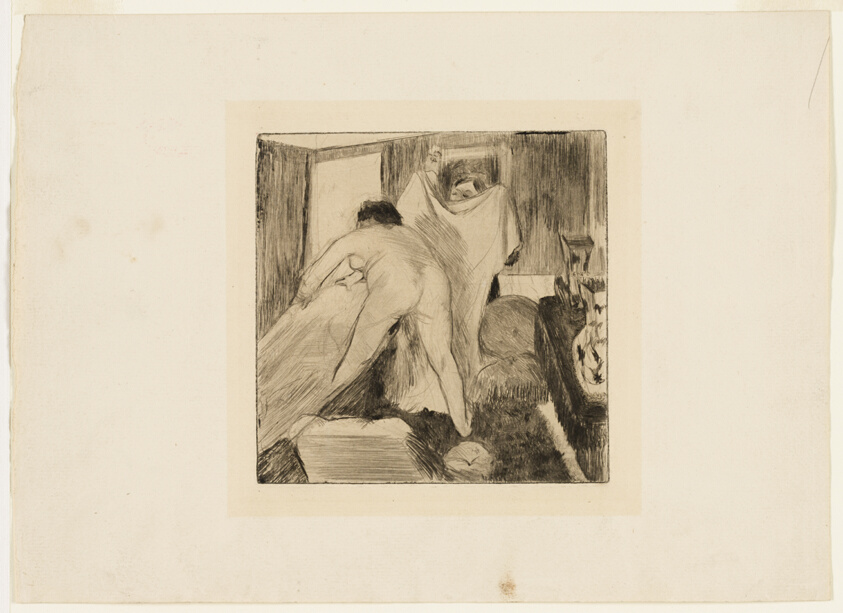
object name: Print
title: Leaving the Bath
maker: Edgar Degas; French, 1834-1917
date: 1879–80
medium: Drypoint and aquatint on cream laid paper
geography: France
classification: drypoint; print; prints and drawing; paper